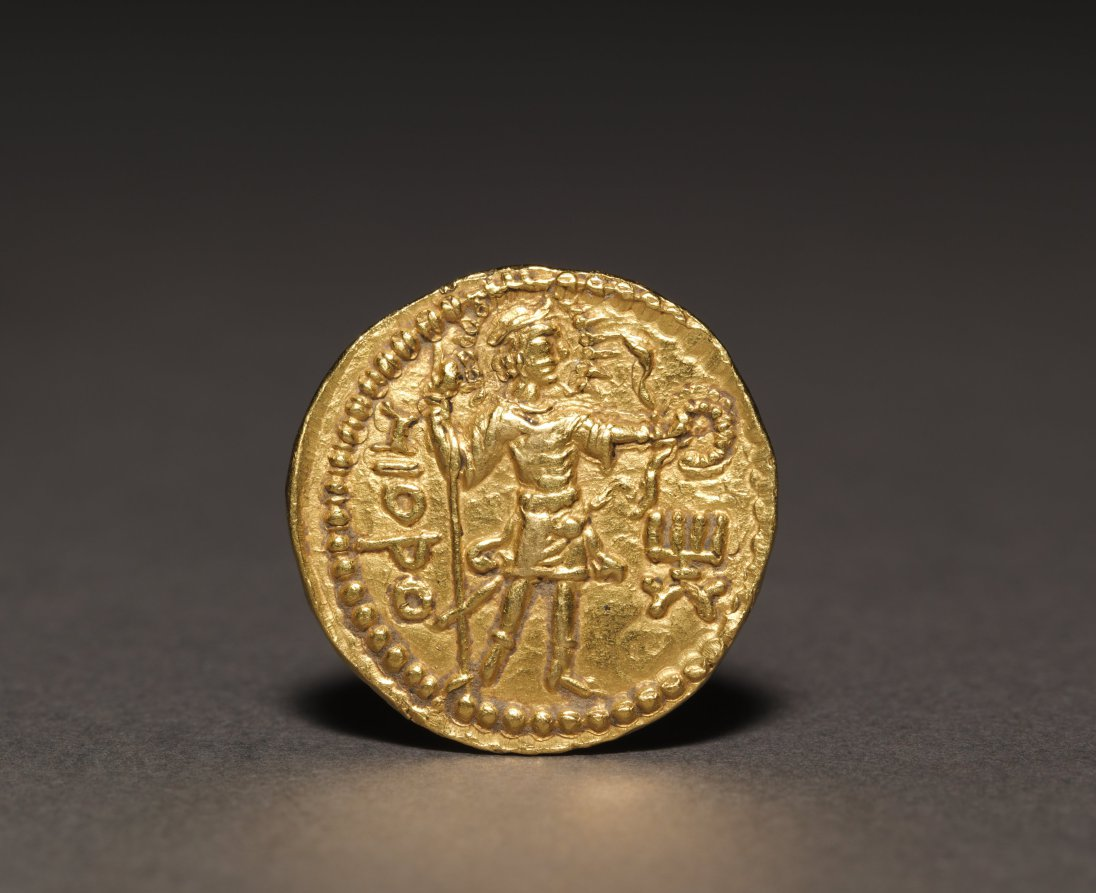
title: Coin: Havishka (reverse)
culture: India, Mathura, Kushan period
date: c. 106–149 CE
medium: gold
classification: Coins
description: This gold coin represents the reign of the Kushana ruler, Havishka. The coin bears a portrait of the ruler on the obverse and various deities on the reverse. It is identified by inscriptions in Kharosthi, the language used in northwestern India during the Kushan period.